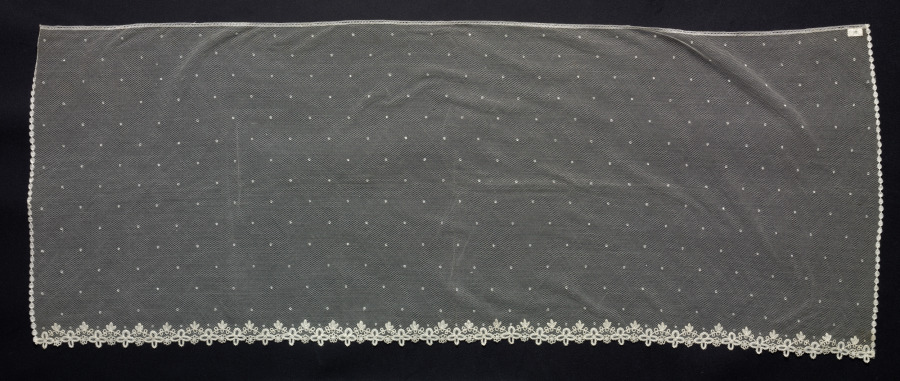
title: Lace Veil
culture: Flanders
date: 1811–99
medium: Bobbin lace and machine-made lace with applique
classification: Lace